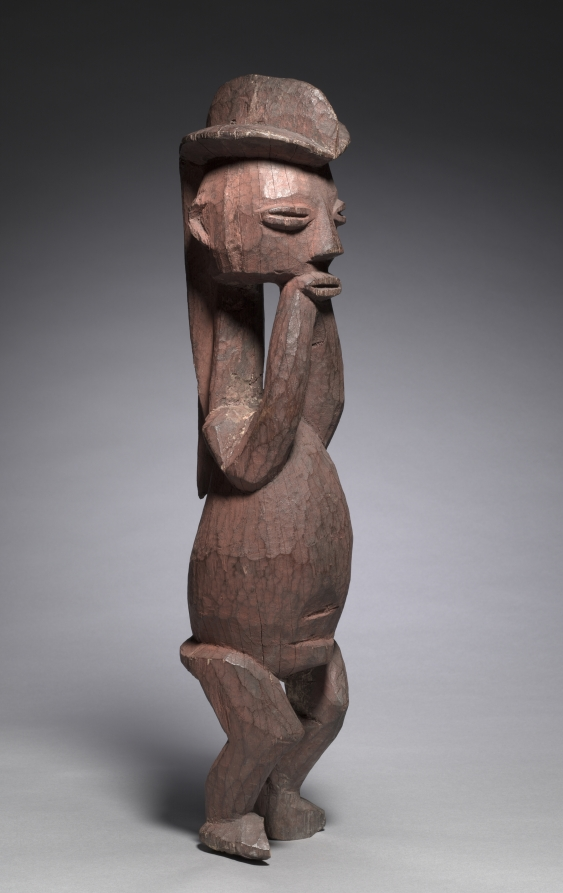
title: Male Figure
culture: Africa, Central Africa, Democratic Republic of Congo, Hungaan-style maker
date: mid- to late 1800s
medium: Wood and colorant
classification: Sculpture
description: Hungaan figures of this size served as guardians of ritual shrines and functioned in rituals to promote fertility, guarantee well-being, and ensure longevity. The striking crested hairstyle imitates a real coiffure or a wig, indicative of status and prestige. The hands supporting the chin identify the figure as a chief who is immersed in thought and contemplation, pondering over his responsibilities.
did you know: The red powdery surface of this figure mimics a red body adornment that mixed ground camwood with palm oil.